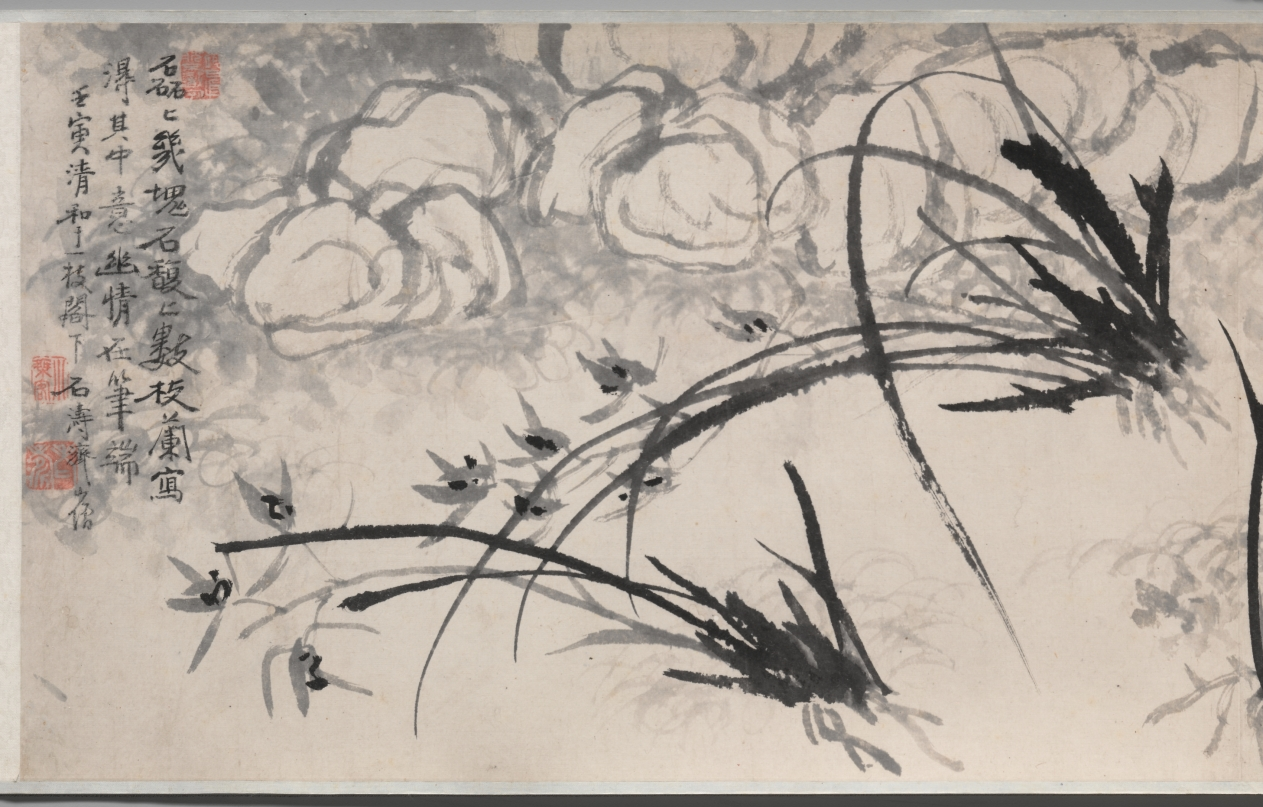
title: Rocks, Orchid, and Bamboo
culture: China, Qing dynasty (1644-1911)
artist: Shitao (Chinese, 1642–1707)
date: 1662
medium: handscroll; ink on paper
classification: Painting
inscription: Title colophon in four characters with signature and two seals on gold-flecked paper.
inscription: Artist's signature, inscription (with date of 1662), five seals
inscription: Colophon with two seals.